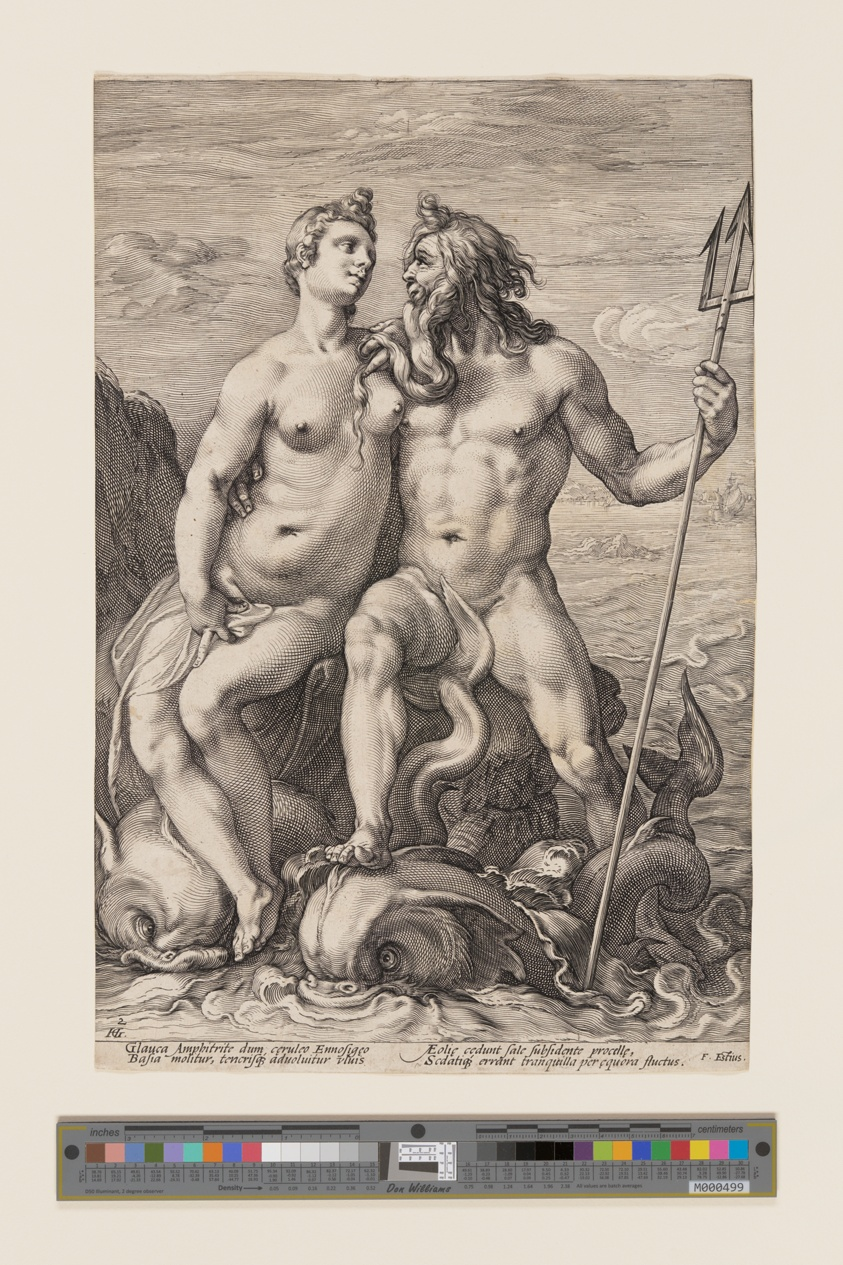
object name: Print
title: Neptune and Amphitrite, from Three Paired Gods and Goddesses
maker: Jan Saenredam (Dutch, 1565–1607); after Hendrick Goltzius (Dutch, 1558–1617)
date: c. 1594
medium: Engraving on ivory laid paper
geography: Netherlands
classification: engraving; paper; print; prints and drawing